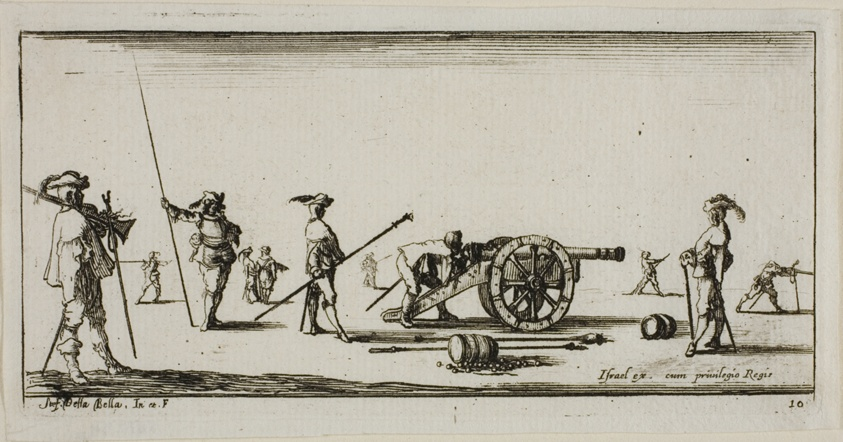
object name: Print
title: Plate Ten from Drawings of Several Movements by Soldiers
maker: Stefano della Bella (Italian, 1610-1664)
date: 1644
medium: Etching on ivory laid paper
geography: Italy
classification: etching; paper; print; prints and drawing